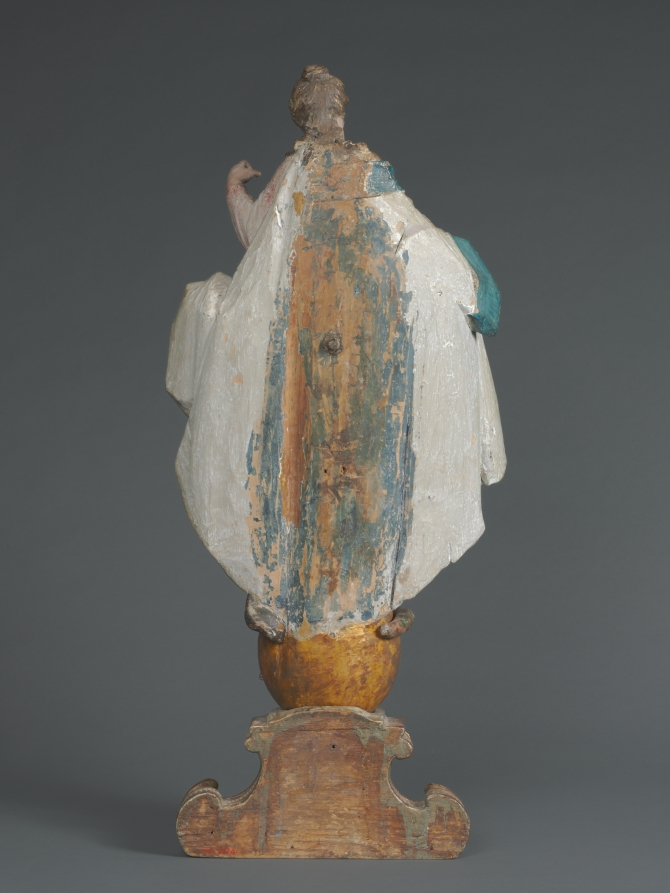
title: The Immaculate Conception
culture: Germany, Munich, 18th century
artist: Ignaz Günther (German, 1725–1775)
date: c. 1770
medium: painted and gilded wood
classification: Sculpture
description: The Christian doctrine of the Immaculate Conception maintains that the Virgin Mary was conceived free from sin, ready to be the pure vessel for Christ’s birth. Depicting such an abstract idea required specific imagery. The moon beneath the Virgin’s feet, for example, comes from the New Testament vision of Saint John the Evangelist (Revelation 12:1) of “a woman clothed with the sun, with the moon under her feet,” while the serpent upon which she treads symbolizes Christ’s triumph over original sin. With his characteristically delicate modeling, elongated proportions, and soft coloring, Ignaz Günther created an archetypal image of innocence on the cusp of womanhood.